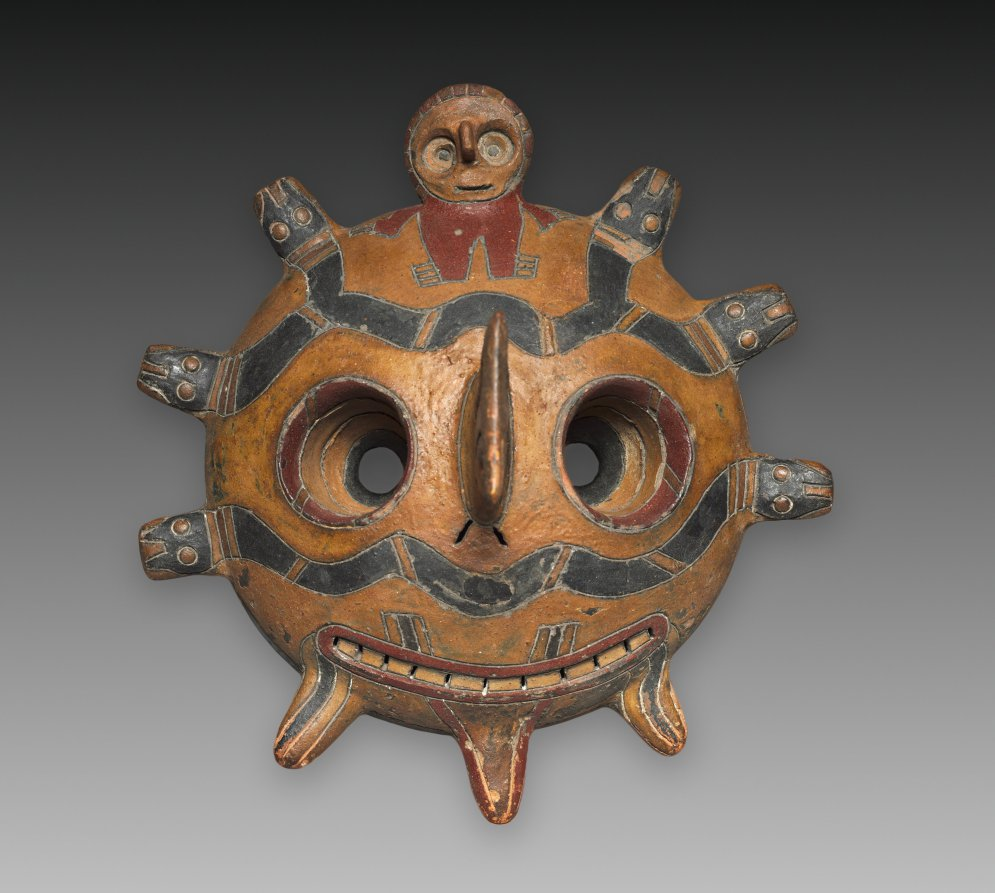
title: Oculate Being Mask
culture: Peru, South Coast, Paracas (Cavernas) style (700 BCE–1 CE)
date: 300 BCE–1 CE (thermoluminescence date, 835 BC–185 CE)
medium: ceramic, resin-based paint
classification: Ceramic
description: This rare mask incarnates a supernatural being who may have been the patron of an early fertility cult on Peru’s south coast. Its traits insinuate power, especially the stuck-out tongue and the serpents that slither over the face to form a halo-like corona. Unexplained are the shape of the nose and the small figure wearing a similar mask. The mask could have served as the face of a mummy bundle or an object; the projecting eyes might rule out use by a living performer.